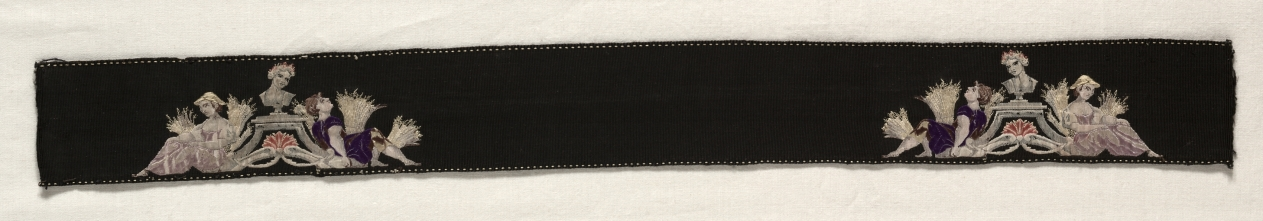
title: Ribbon: "Allegories of Harvest"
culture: England, early-mid-19th century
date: 1800 – 1850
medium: patterned tabby weave; silk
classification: Textile